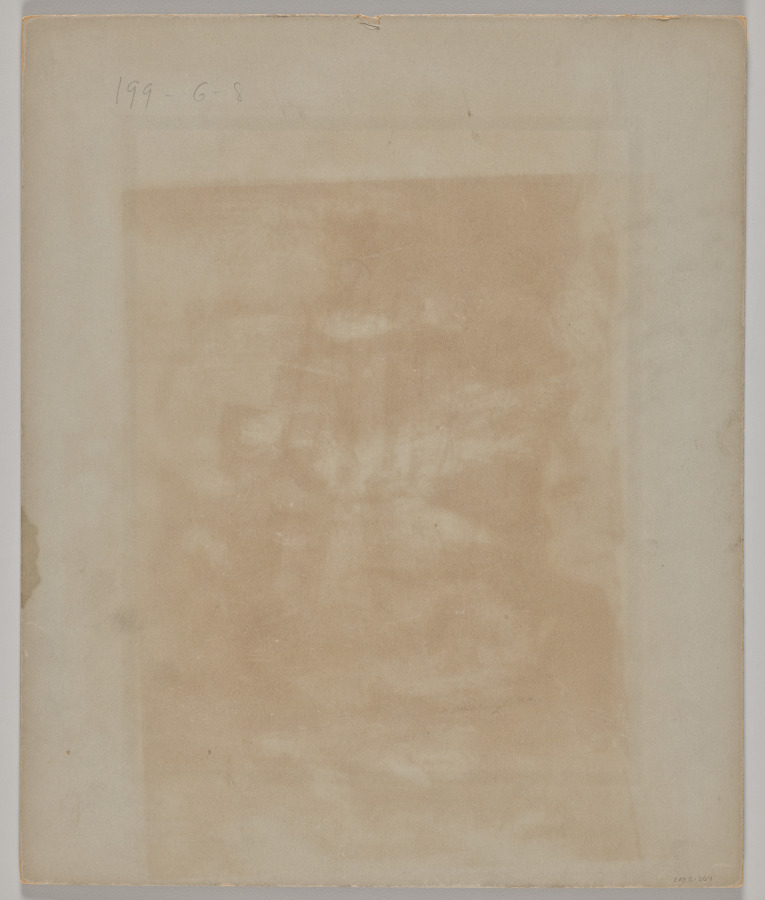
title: Untitled (theatrical scene with 3 figures: the palm reader)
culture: England, 19th century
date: 1880s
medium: woodburytype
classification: Photograph